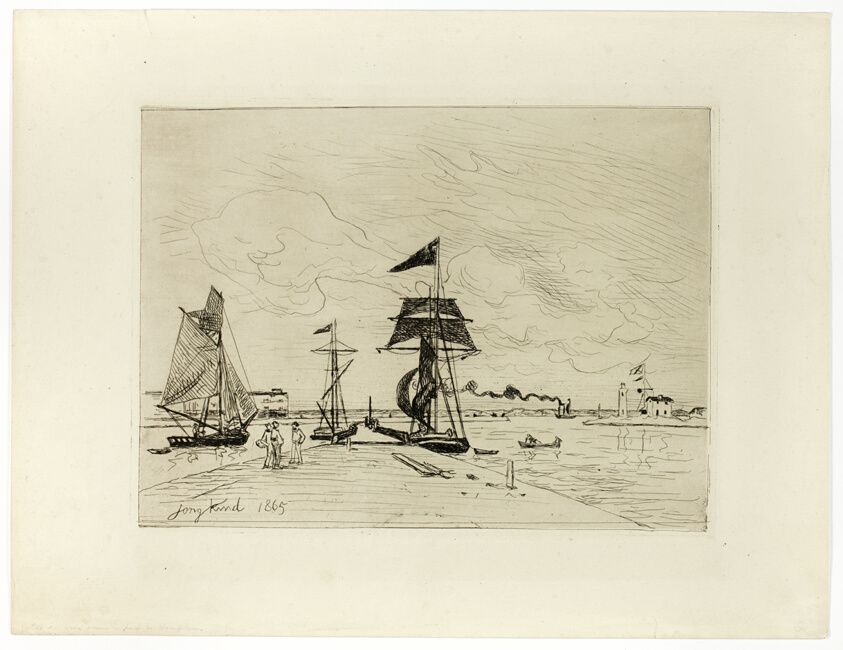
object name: Print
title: Pier at the Port of Honfleur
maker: Johan Barthold Jongkind (Dutch, 1819-1891)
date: 1865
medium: Etching in black on cream laid paper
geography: Netherlands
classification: etching; paper; print; prints and drawing